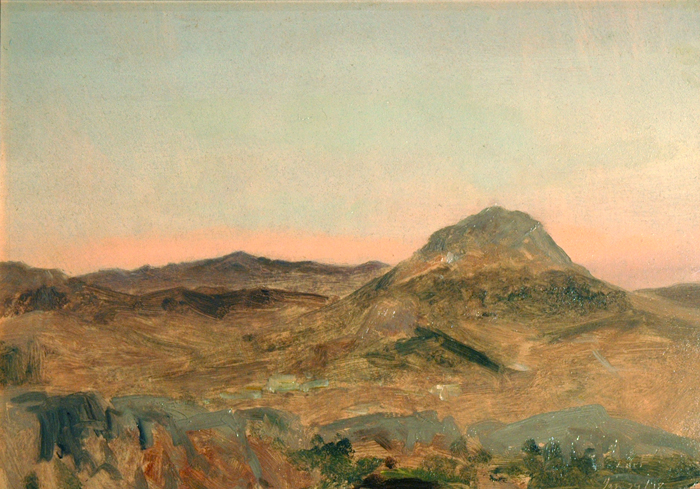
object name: Drawing and Watercolor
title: Greek Mountain Peak at Twilight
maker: Lockwood de Forest (American, 1850-1932)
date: January 29, 1878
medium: Oil on card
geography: United States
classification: drawings (visual works); prints and drawing